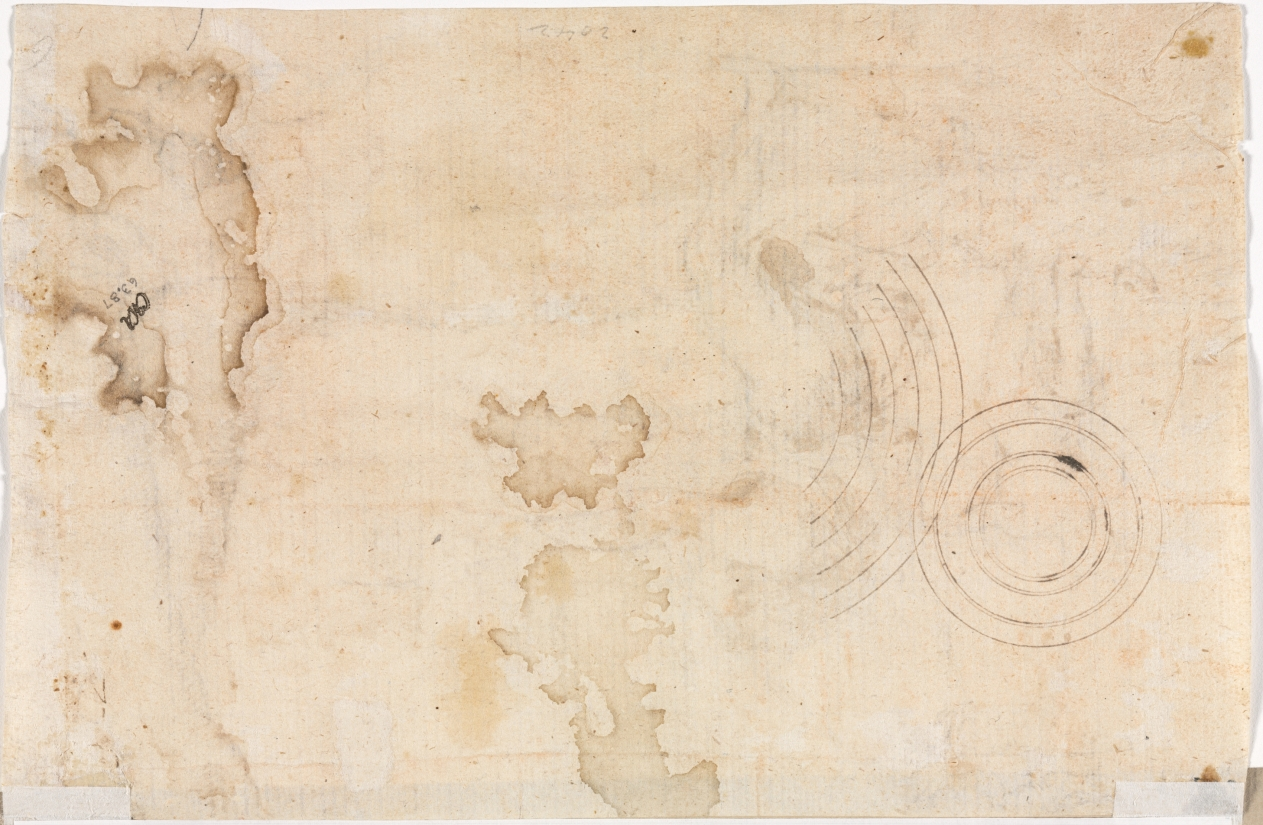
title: Concentric Circles (verso)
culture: Italy, 16th century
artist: Romanino (Italian, 1484/87–1562)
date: c. 1535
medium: pen and brown ink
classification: Drawing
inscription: lower center, in graphite(?): 2042